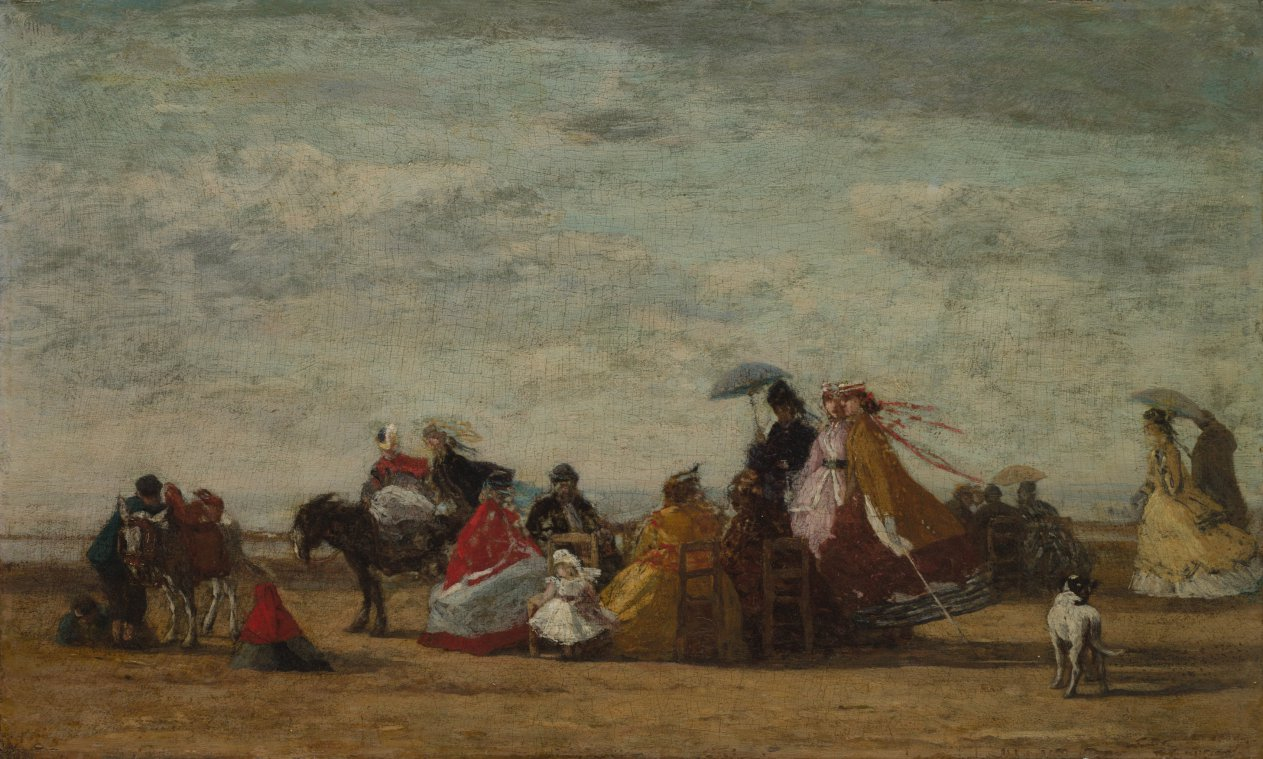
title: Beach Scene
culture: France, 19th century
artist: Eugène Boudin (French, 1824–1898)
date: c. 1865–1867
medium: oil on wood panel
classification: Painting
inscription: Signed lower right: E. Bou[. . .]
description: On a beach where a strong breeze moves off the water from left to right, figures of French women, men, and children in chic Parisian dress stroll, sit, chat, or take donkey rides. The activities depicted (promenades, socializing, riding, sandbox playing) are the same as those enjoyed by residents of London or Paris. At the right, the dog suggests that these are vacationers rather than tourists seeking to recreate their urban pastimes at the seashore. Painted outdoors, this composition is typical of Boudin's beach scenes in the 1860s in its low-lying horizon, cloud-filled sky, and figures ranged across the middle ground. By scattering the figures over the surface and not closing off the scene with framing elements, the artist created the impression of a partial view of a much larger scene.